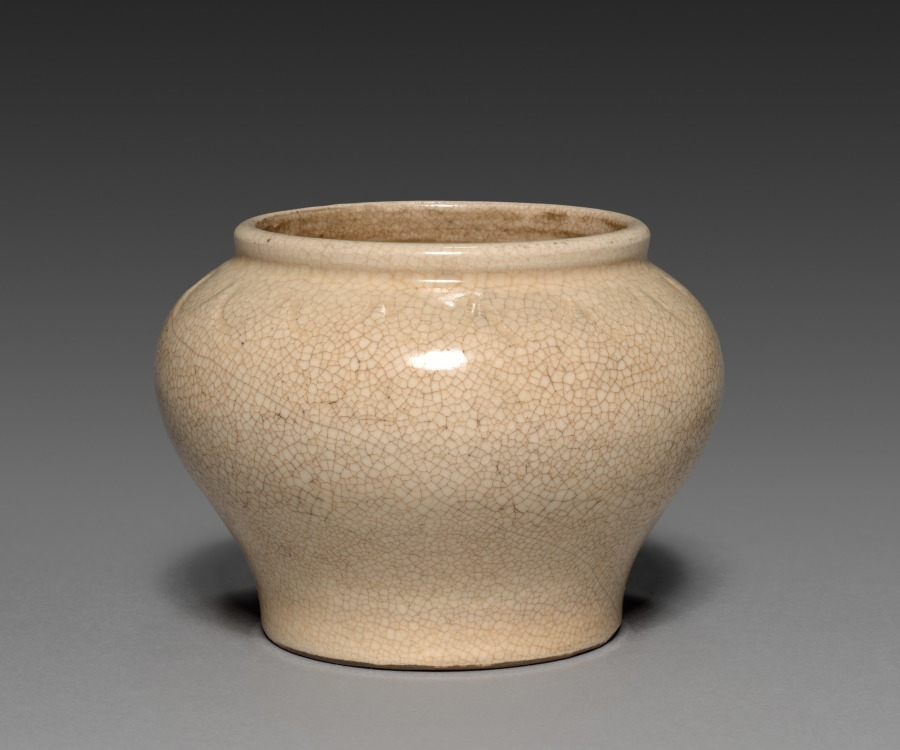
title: Jar (Satsuma ware)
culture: Japan, Meiji period (1868–1912)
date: 1868–1912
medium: pottery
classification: Ceramic